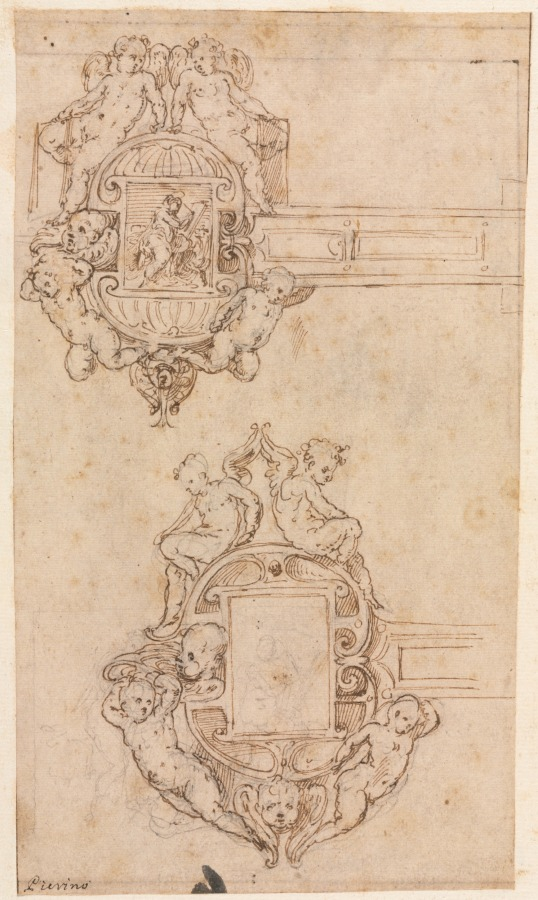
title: Design for Decorative Hinges (recto)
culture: Italy, 16th century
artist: Luzio Romano (Italian, active 1528–75)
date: mid 1500s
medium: pen and brown ink over black chalk; framing lines in brown ink (lower left, upper right)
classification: Drawing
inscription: lower left, in brown ink: Pierino ; RECTO OF SECONDARY SUPPORT, upper right, in brown ink: 128 ; upper right, in black chalk(?): 32 ; center right, in graphite: 28 [underlined, sideways] ; lower right, in graphite: cx[l?] ; VERSO OF SECONDARY SUPPORT, lower right, in graphite: A 309[7?] . ; FRAGMENT OF OLD MAT (now removed), across top, in graphite: Pierino del Vaga (circle of) Door Hinges ; across center, in graphite: Enlarged duplicate of / drawing at Windsor Castle / A. N. [underlined] ; lower right, in graphite: 159